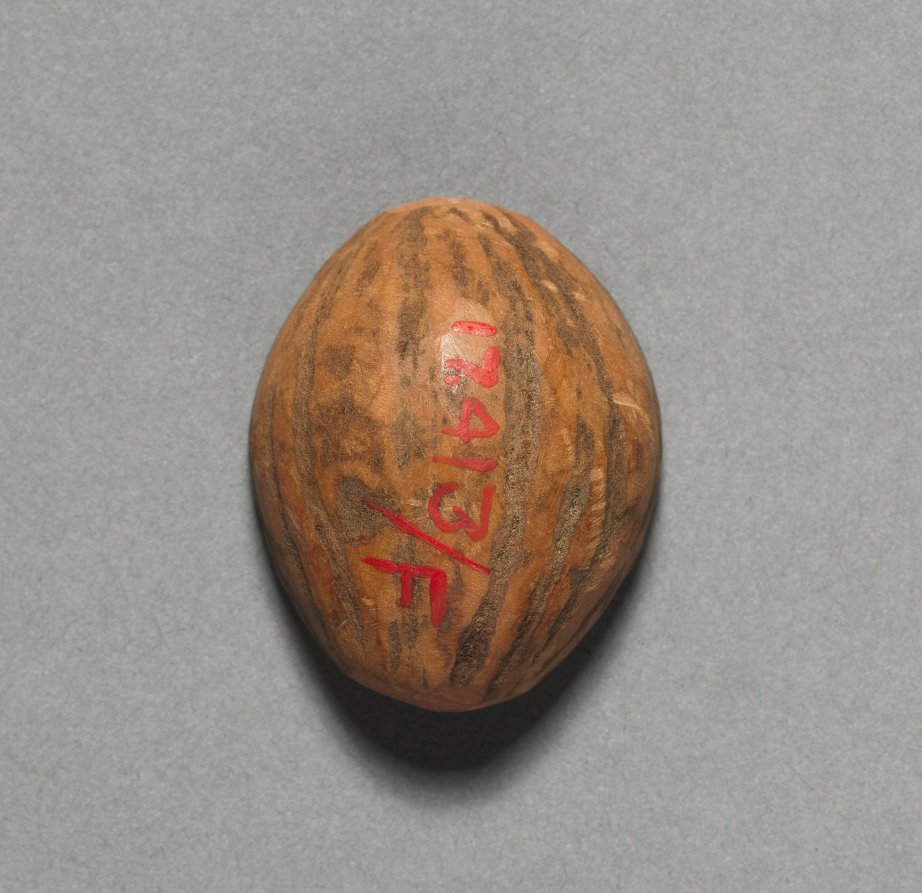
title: Gambling Dice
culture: California, Tulare, Unassigned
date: before 1917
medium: hollow shell, resin, glass beads, mica/seashell fragment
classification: Implements